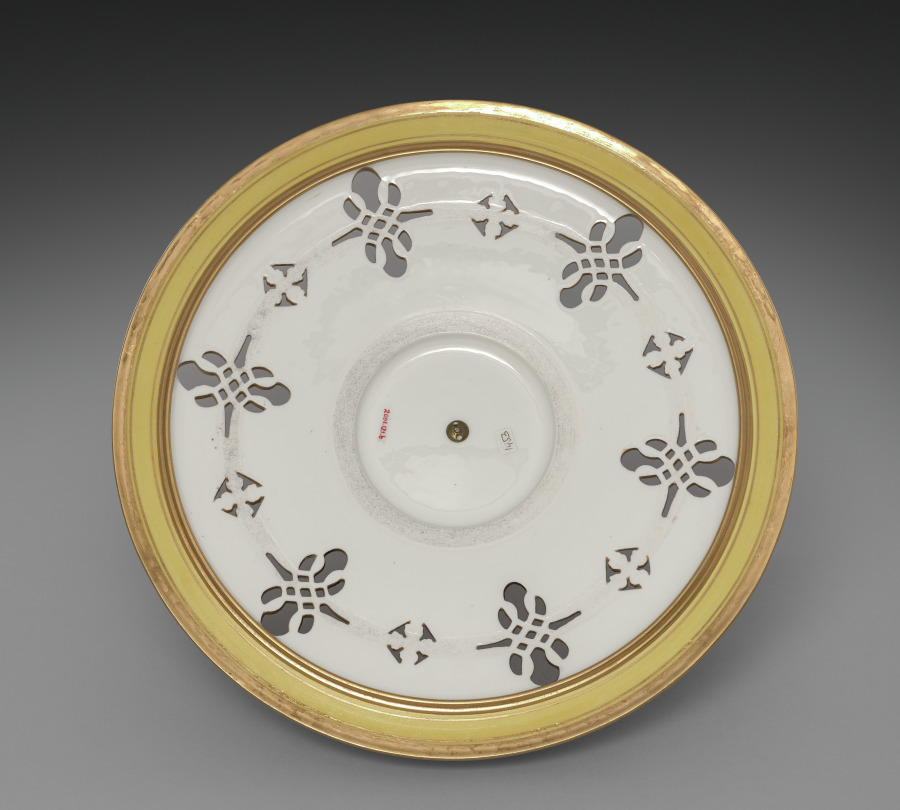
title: Cover for a Standing Cup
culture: France, Sèvres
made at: Sèvres Porcelain Factory (French, est. 1756)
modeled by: Hyacinthe-Jean Regnier (French, 1803–1870)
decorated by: Francois-Hubert Barbin (French, 1786-)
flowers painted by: Jacques-Nicolas Sinsson (French)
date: 1844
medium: porcelain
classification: Ceramic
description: The official French porcelain factory at Sèvres has always been one of Europe's most important ceramic manufacturers, famous for its decorative pieces as well as more utilitarian wares. This vase in the Renaissance style, its design inspired by 16th-century French examples, is clearly in the tradition of elaborately conceived and decorated pieces intended for use by the French court or as presentation pieces by its monarchs. The latter was the fate of this Covered Cup, acquired in 1846 by Queen Marie-Amélie d'Orleans, the wife of Louis-Philippe, king during the July Monarchy (1830-48). Soon thereafter the vase was presented to a now unknown person. It is one of four pieces of this design made at the Sèvres factory, and the only one known today to have survived.